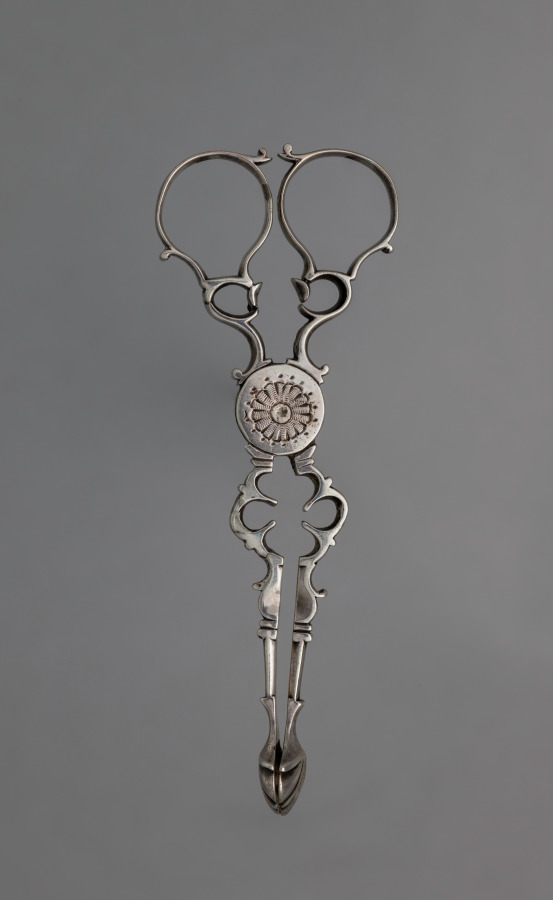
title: Sugar Tongs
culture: England, London, 18th century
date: c. 1750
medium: silver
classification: Silver